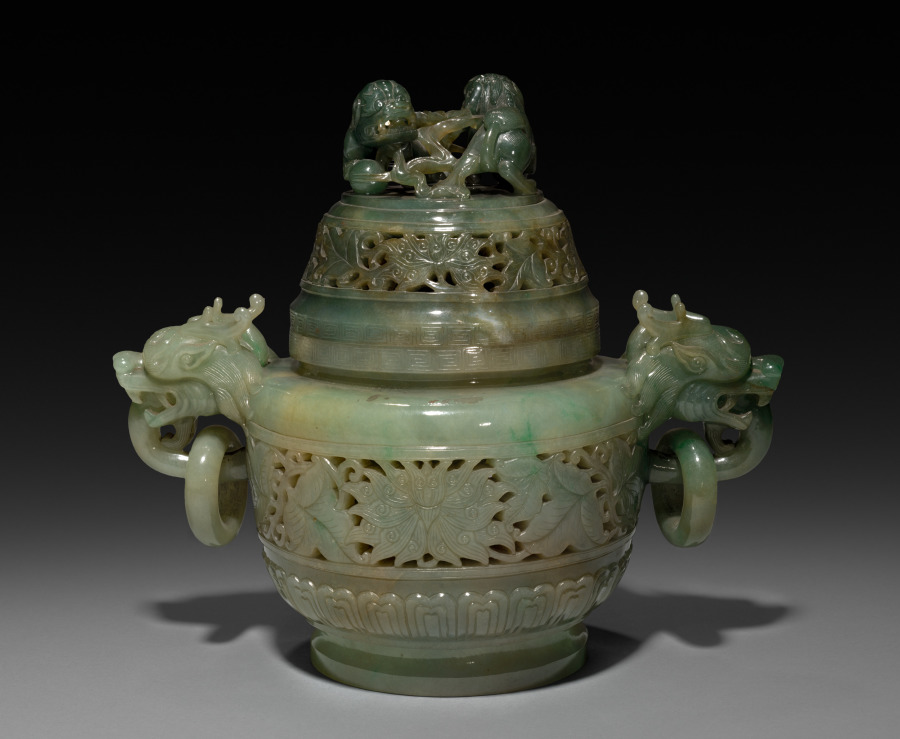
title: Koro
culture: China, Qing dynasty (1644–1911), Qianlong reign (1736–95)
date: 1736–95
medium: jade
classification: Jade